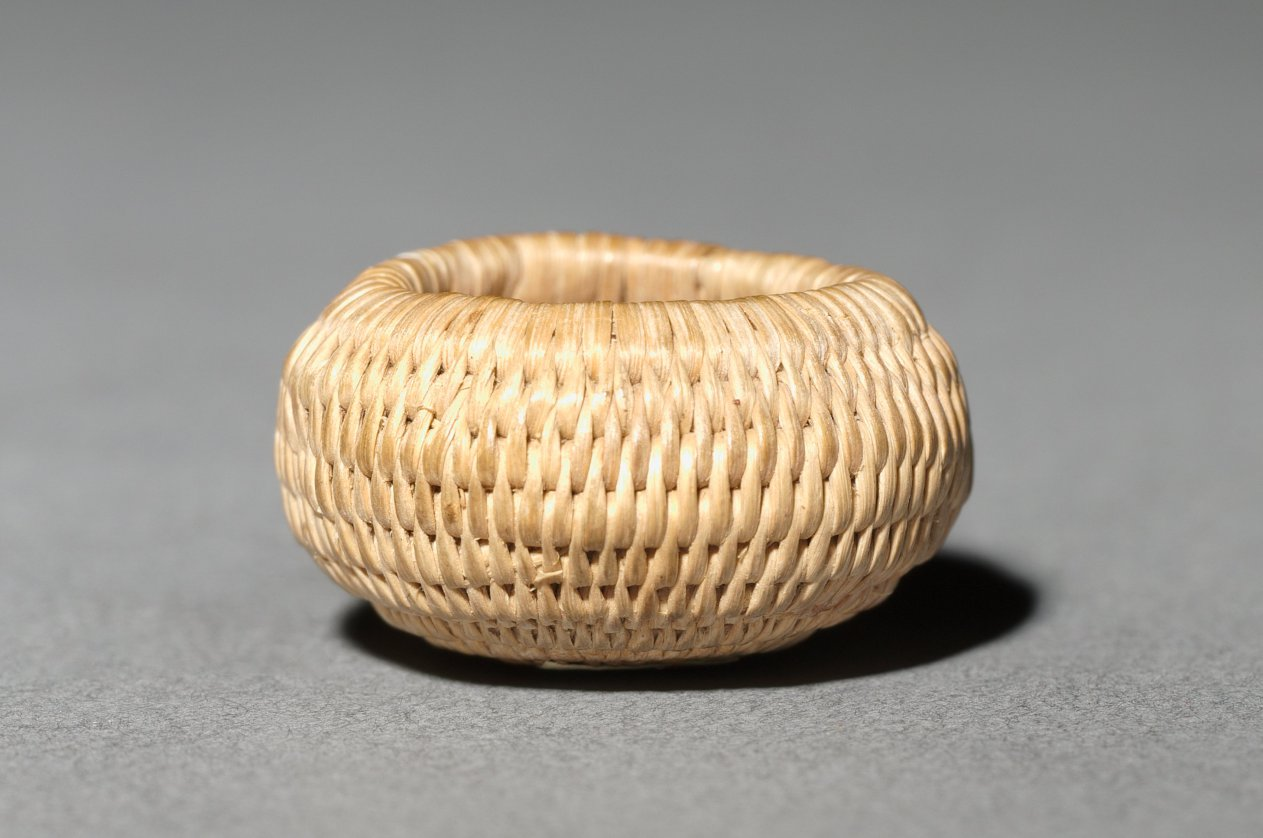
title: Miniature Basket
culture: America, Native North American, Southwest, Arizona, Akimel O'odham (Pima), Unassigned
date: before 1923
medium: plant fiber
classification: Basketry